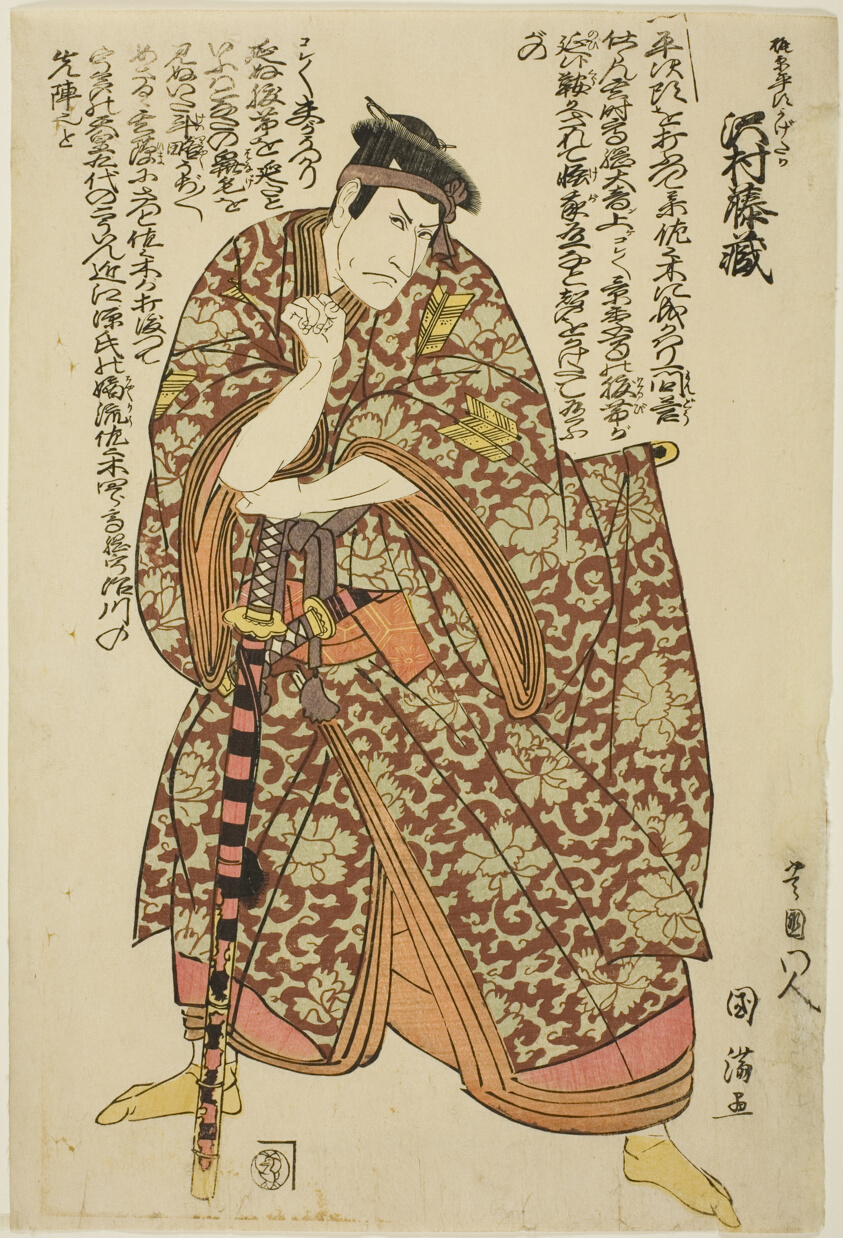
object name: Print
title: The actor Sawamura Tozo as Kajiwara Heiji Kagetaka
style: Japanese (culture or style)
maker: Utagawa (Ichiosai) Kunimitsu I (Japanese, active c. 1801-30)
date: c. 1801/18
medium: Color woodblock print; oban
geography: Japan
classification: print; asian art